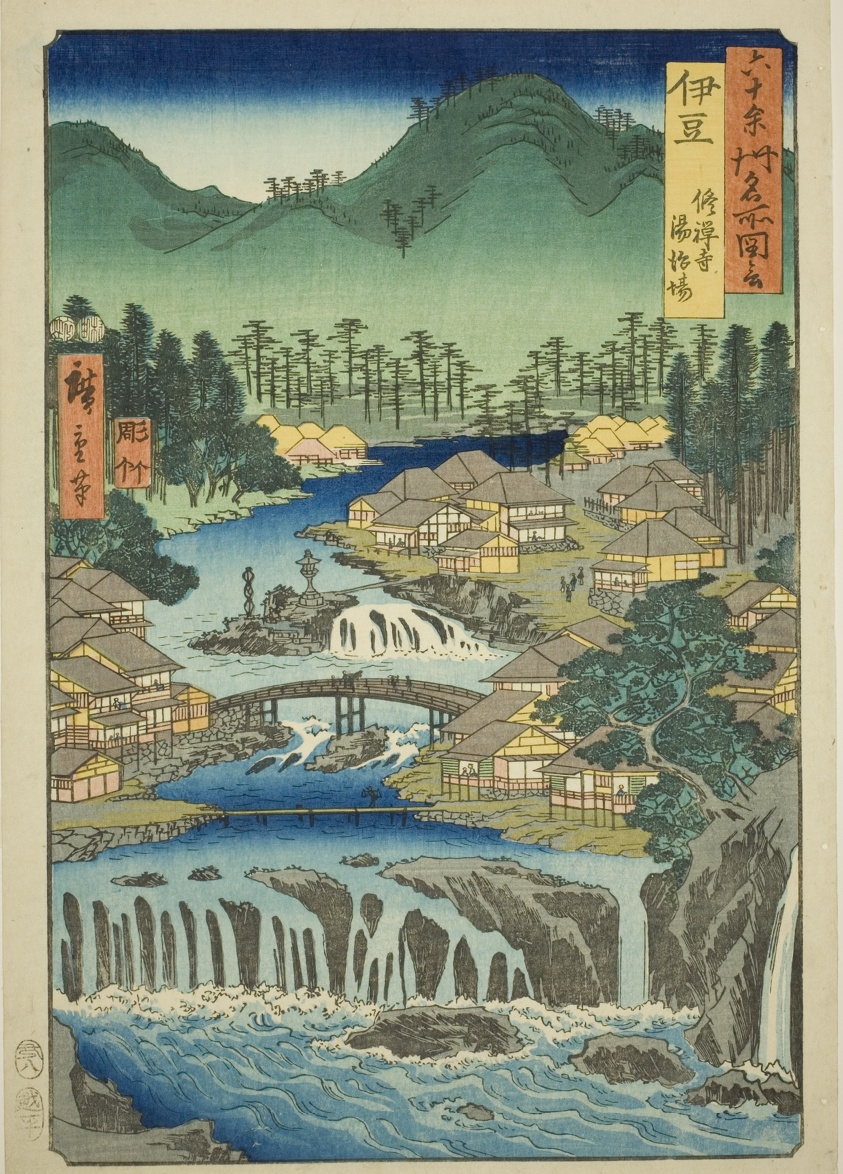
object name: Print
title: Izu Province: Hot Springs of the Shuzen Temple (Izu, Shuzenji tojiba), from the series "Famous Places in the Sixty-odd Provinces (Rokujuyoshu meisho zue)"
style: Japanese (culture or style)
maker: Utagawa Hiroshige 歌川 広重; Japanese, 1797-1858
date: 1853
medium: Color woodblock print; oban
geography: Japan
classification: woodblock print; print; asian art